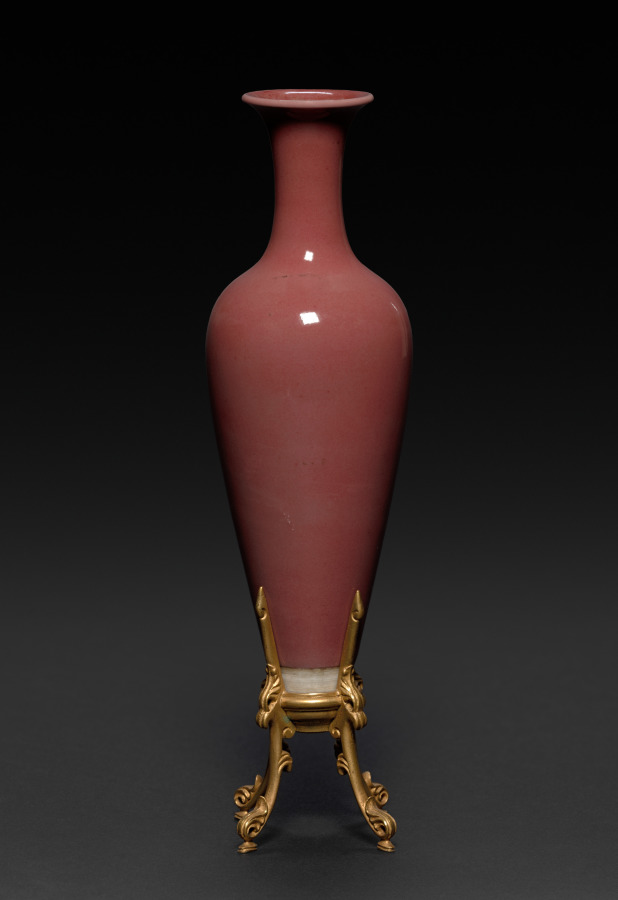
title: Bottle with Peach Bloom Glaze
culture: China, Qing dynasty (1644-1911), Kangxi reign (1661-1722)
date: 1662–1722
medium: porcelain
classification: Ceramic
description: The "peach-bloom" glaze developed during the Kangxi era has also been described as "drunken with beauty." Technical achievements were transcended with aesthetic associations, revealing the greatest sensitivity to all things beautiful in nature.